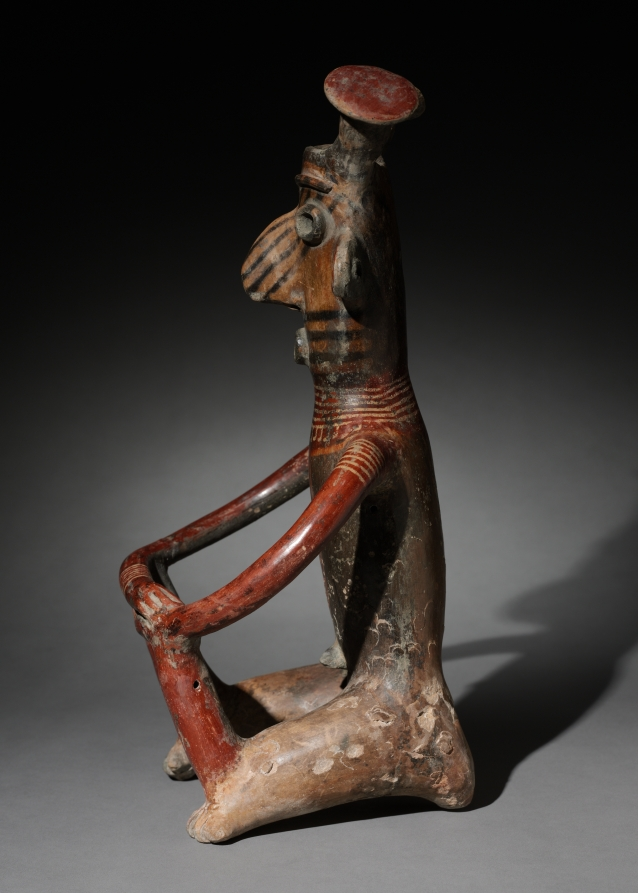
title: Seated Male Figure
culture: Mexico, Jalisco, Zacatecas Style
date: c. 200 CE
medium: earthenware with colored slips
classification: Sculpture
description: A female once accompanied this abstract male. The two may have had the same meaning as the nearby couple. They were also similarly linked by physical form, though the female’s head had no projections, the meaning of which is unknown. The size of the circle formed by the arms suggests that the figure once held something, perhaps a perishable offering.